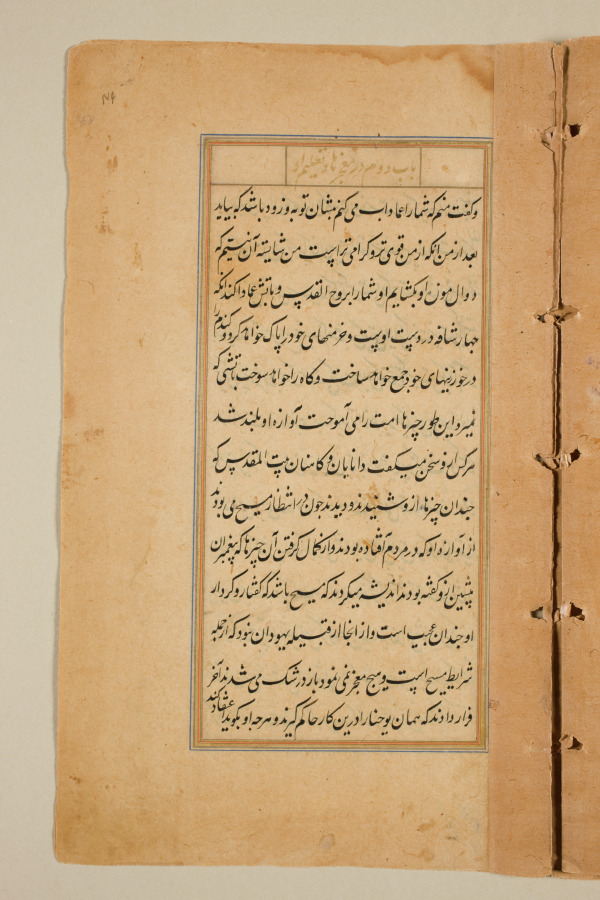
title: Text page from a Mirror of Holiness (Mir’at al-quds) of Father Jerome Xavier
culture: Mughal India, Allahabad, made for Prince Salim (1569–1627)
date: 1602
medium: Ink and gold on paper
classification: Manuscript